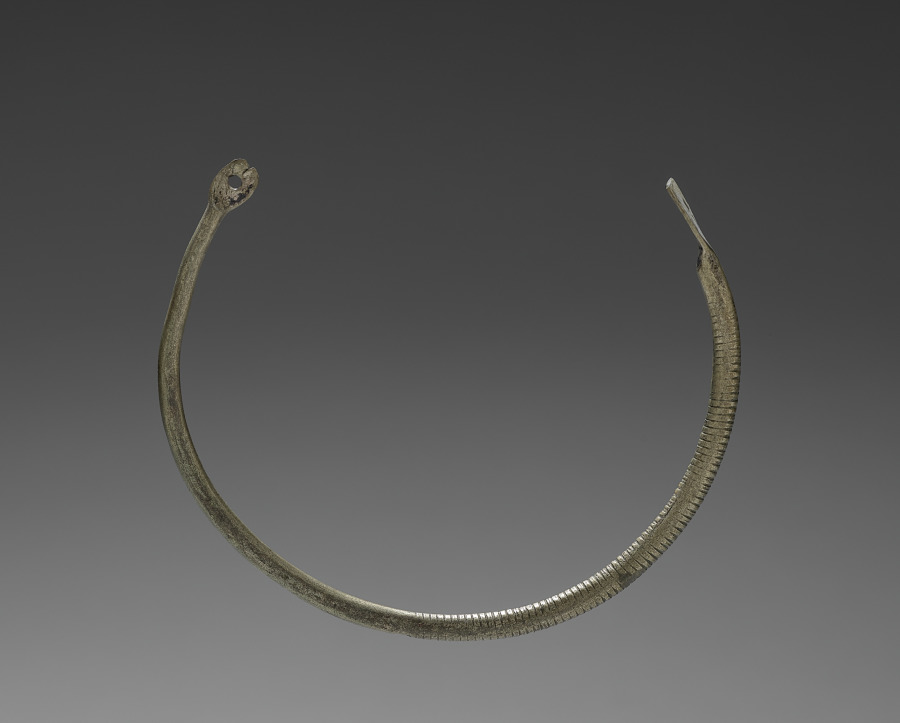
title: Nose Ring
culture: Indo-Chinese, made in France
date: 20th Century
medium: silver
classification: Jewelry